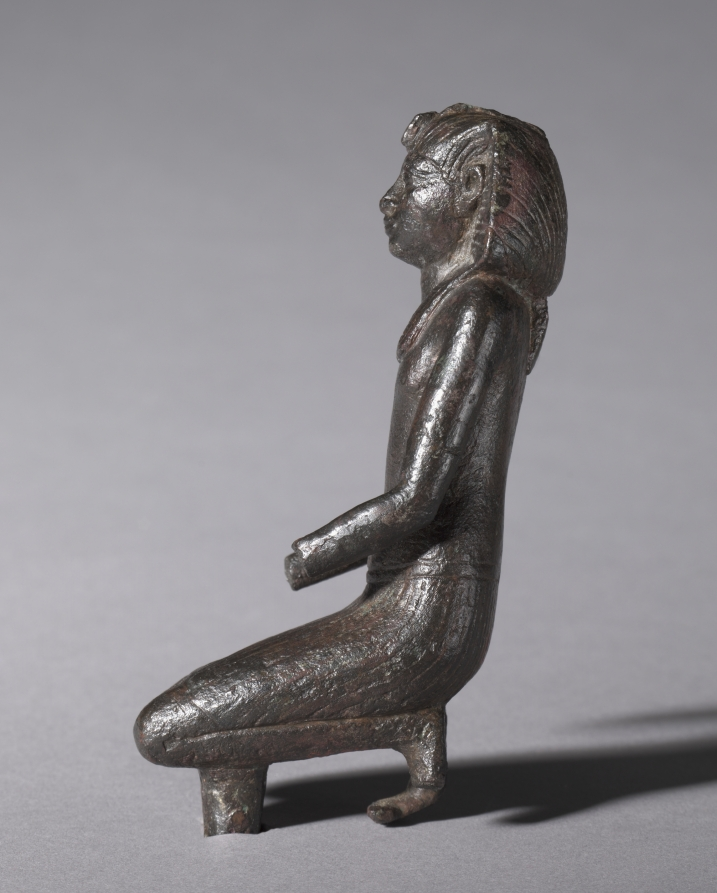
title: Statuette of Kneeling King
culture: Egypt, Greco-Roman period (332 BCE–395 CE), Ptolemaic dynasty (305–30 BCE)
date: 304–30 BCE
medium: bronze, solid cast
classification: Sculpture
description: As the chief intermediary between gods and men, the Egyptian king is often shown kneeling in adoration. Enough remains of this king's arms to indicate that his hands may have held offering jars or were extended with the palms facing each other around a naos, or shrine, containing a divine image. In Egypt, adoration required a divine recipient. This example was undoubtedly part of a group composition in which the king faced a larger figure of a god.